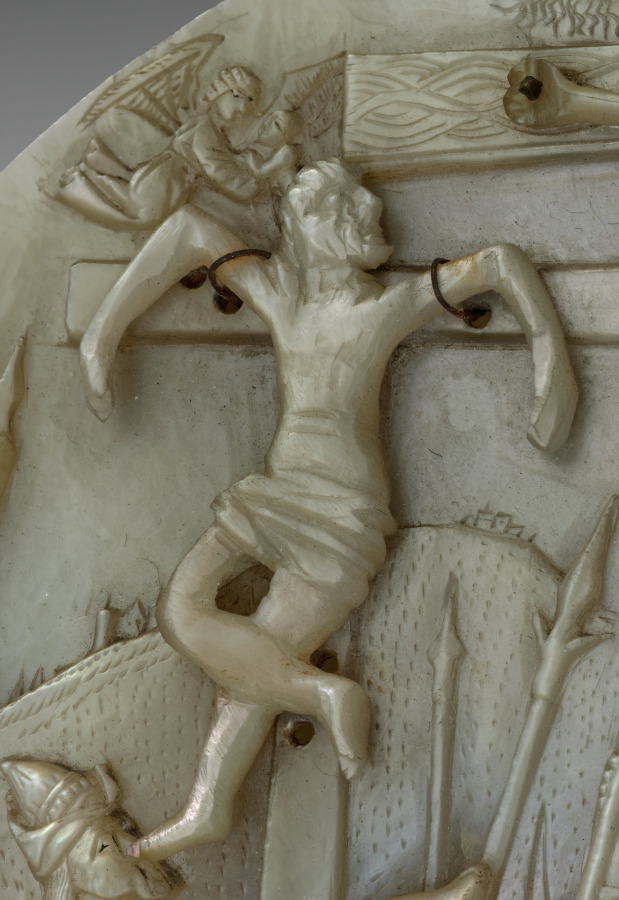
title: Calvary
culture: Germany, Middle Rhine?, 15th century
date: c. 1450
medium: mother-of-pearl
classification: Sculpture